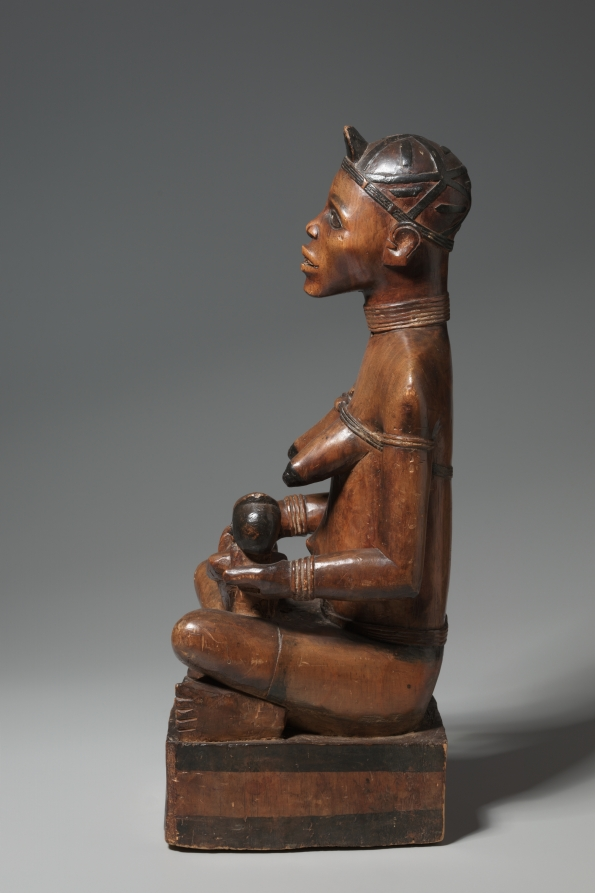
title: Mother and Child Figure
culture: Africa, Central Africa, Democratic Republic of Congo (most likely), Cabinda, or Republic of the Congo, probably Yombe-style maker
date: late 1800s–early 1900s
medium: Wood and paint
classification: Sculpture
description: This Mother and Child Figure is attributed to the Yombe peoples, who inhabit a large territory now divided among the nations of Congo, Democratic Republic of Congo, Zambia, and Angola. Its origin has been traced to the areas surrounding the village of a master carver in the western Democratic Republic of Congo, where similarly carved objects were collected in the early 20th century. Its naturalism suggests that it could have been the portrait of a real person, and thus an excellent testimonial to the immense talent of the artist who carved it. Once referred to as the “Burniaux maternity figure,” after the Belgian collector F. Burniaux, who owned it from about 1930 to 1980, the sculpture was acquired by the Cleveland Museum of Art in 1998.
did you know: The sculpture may have been carved in honor of a woman after her death, or after the death of a male chief. Kongo society is matrilineal, so the chief's right to political power is inherited through the female line.